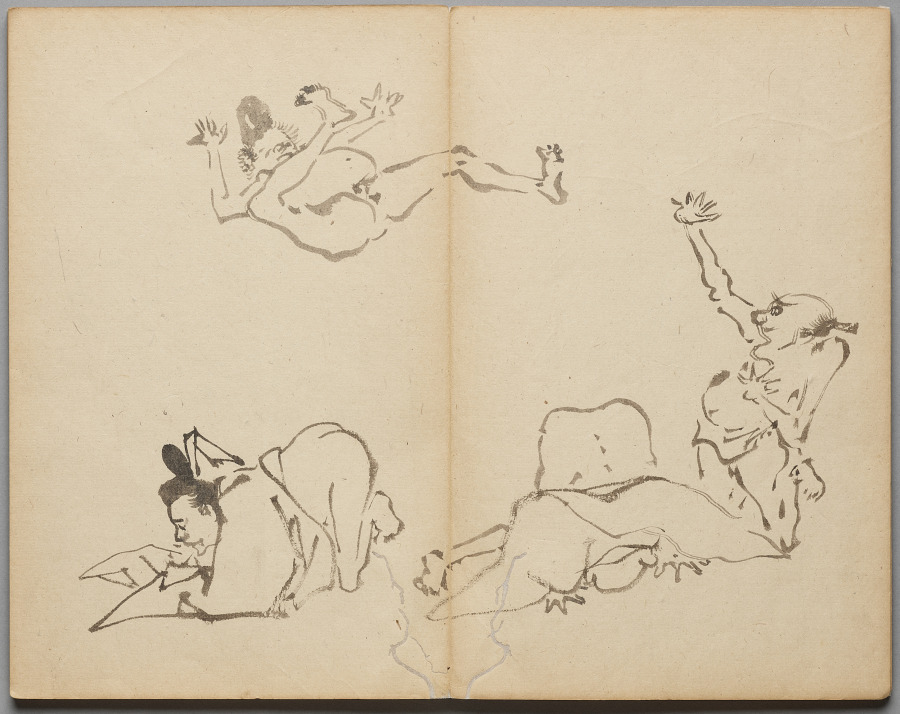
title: Courtiers' Farting Contest from Sketch Album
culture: Japan, Edo period (1615–1868) to Meiji period (1868–1912)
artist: Kawanabe Kyōsai (Japanese, 1831–1889)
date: mid- to late 1800s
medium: Accordion-style book of 26 double-leaves; ink and color on paper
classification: Bound Volume